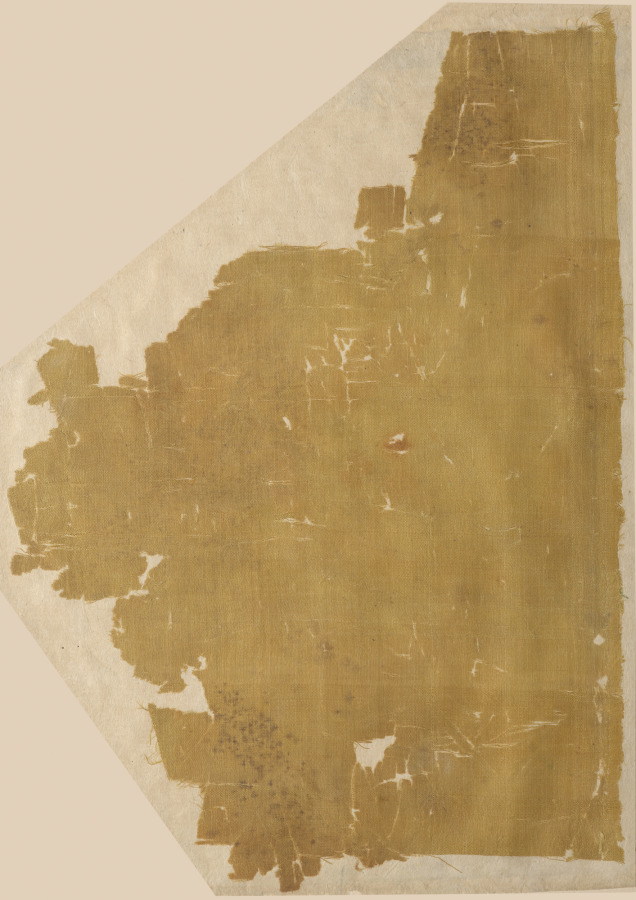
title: Fragment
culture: China or Japan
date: 700s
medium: tabby weave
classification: Textile